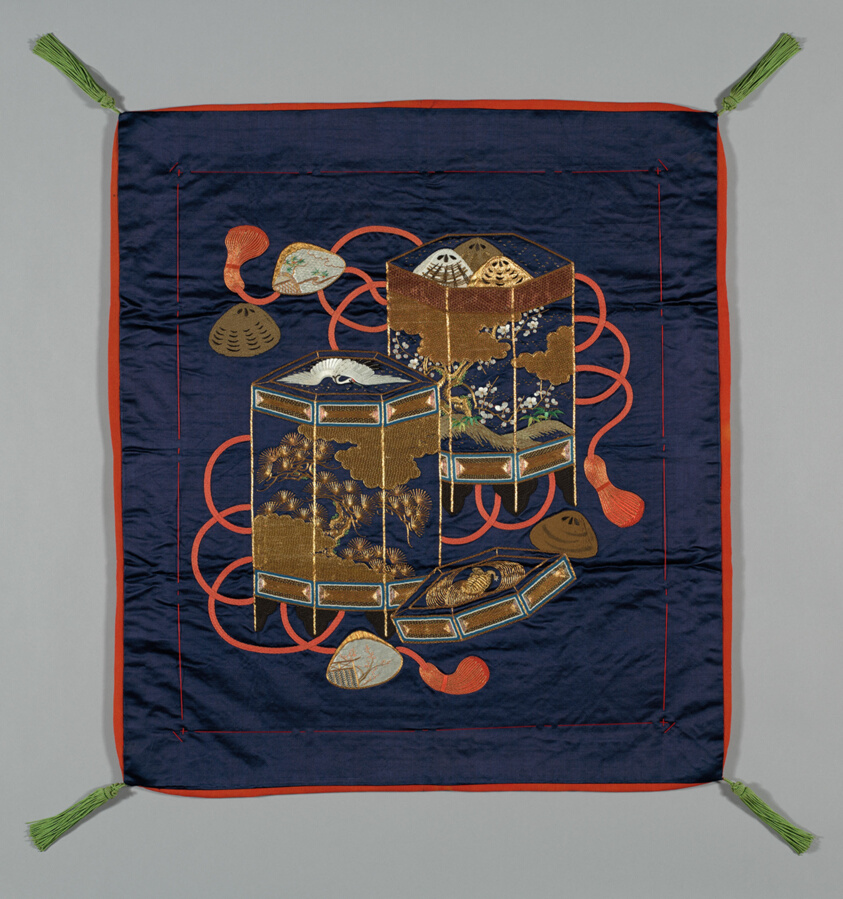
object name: Textile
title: Fukusa (Gift Cover)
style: edo (japanese period), meiji, Japanism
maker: Japan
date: late Edo period (1789–1868)/ Meiji period (1868–1912), 19th century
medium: Patterned side: silk, warp-float faced 4:1 satin weave (shusu); embroidered with silk and gold-leaf-over-lacquered-paper strip wrapped silk and wrapped cotton in back, Chinese knot, single satin and satin stitches; laidwork, paper padded laidwork and couching; Lining: silk, plain weave with creped wefts (chirimen); sewn with lining extending beyond front equally along edges of all sides (Shihôhi); silk, running “controlling” stitches along all edges; corners: silk, four-strand square braid; knotted atop open buttonhole filling stitch covered form terminating in replied fringe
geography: Japan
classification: textile; needlework (visual works); weaving